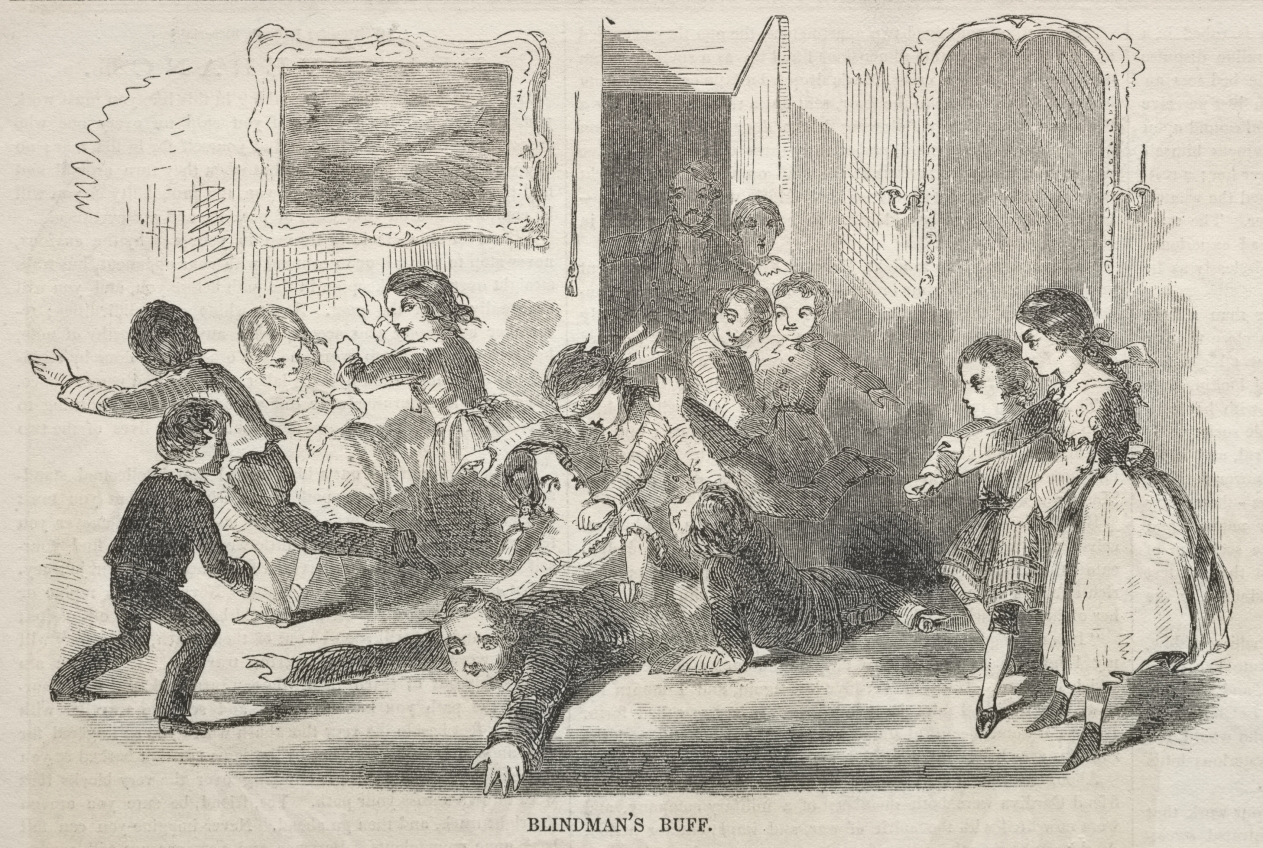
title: Blindman's Buff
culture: America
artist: Winslow Homer (American, 1836–1910)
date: 1857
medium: wood engraving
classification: Print